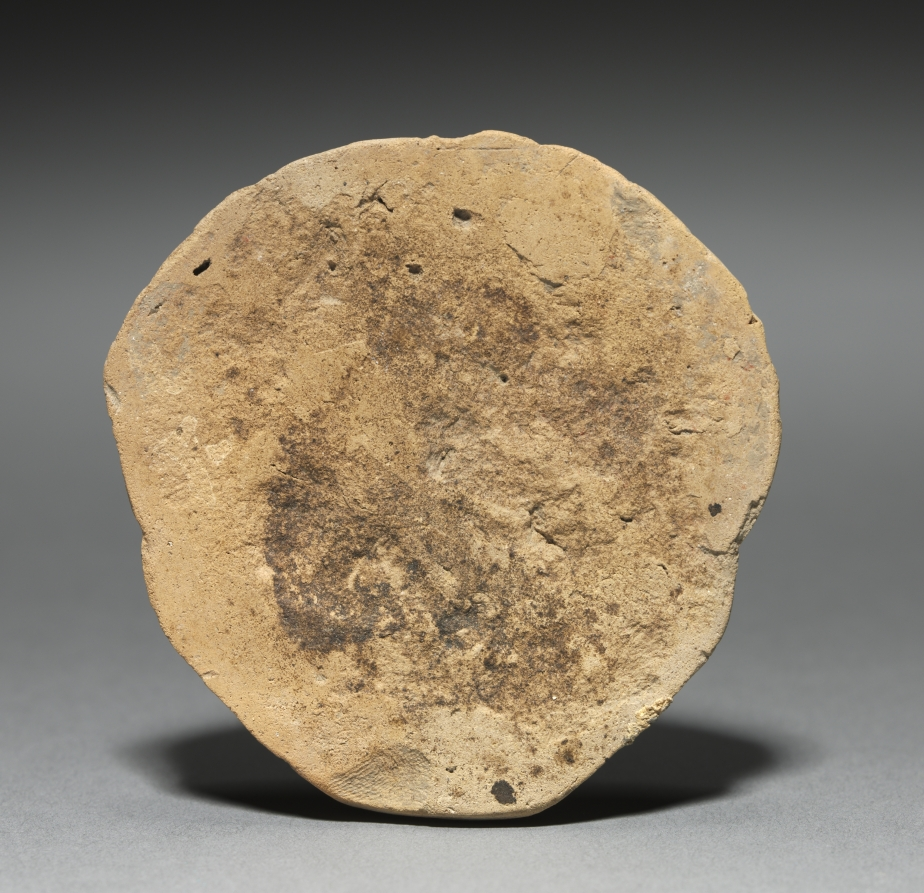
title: Gorgoneion Plaque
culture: Greece, South Italy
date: c. 525–475 BCE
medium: terracotta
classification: Sculpture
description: Probably meant to decorate the outside of a wooden coffin or other tomb furniture, this small mold-made terracotta plaque is one of two in the collection (click here for the other). Both bear gorgoneia, or frontal Gorgon faces, with snaky hair, sharp teeth, and protruding tongue, perhaps meant to ward off evils. A bit of fingerprint survives on the reverse, likely from its ancient maker.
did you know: The gorgoneion, or disembodied head of Medusa, may have served as protection against evils.